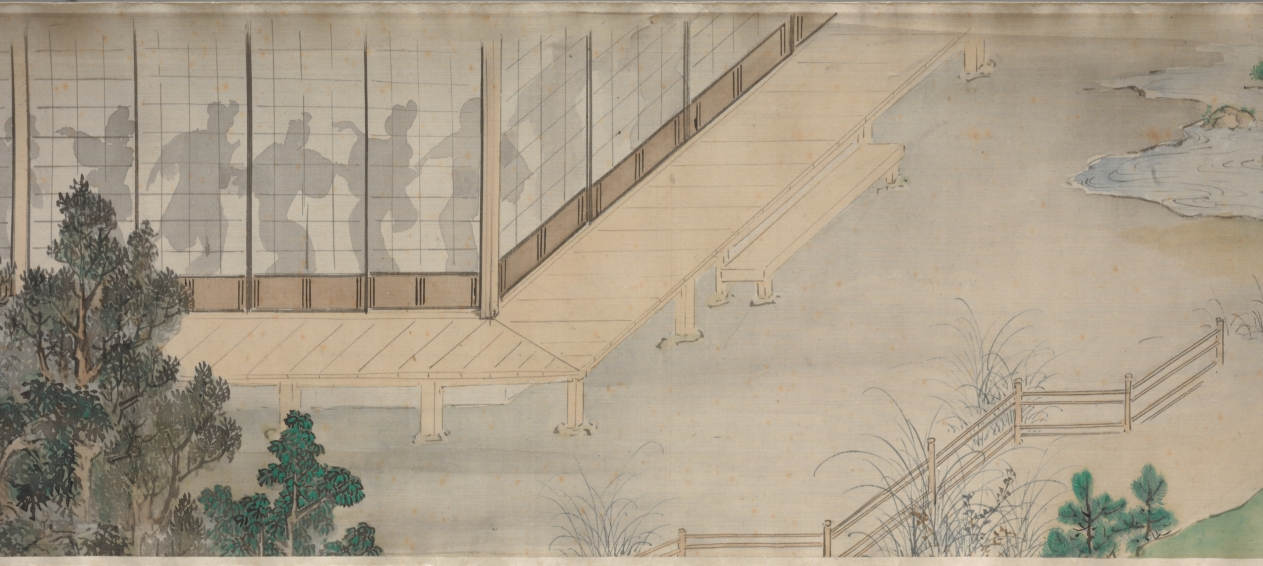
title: The Shadow Dancers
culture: Japan, Edo period (1615–1868)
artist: Yamamoto Baiitsu (Japanese, 1783–1856)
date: 1800s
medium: handscroll, ink and color on silk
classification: Painting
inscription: artist's signature and two seals at end of painting.